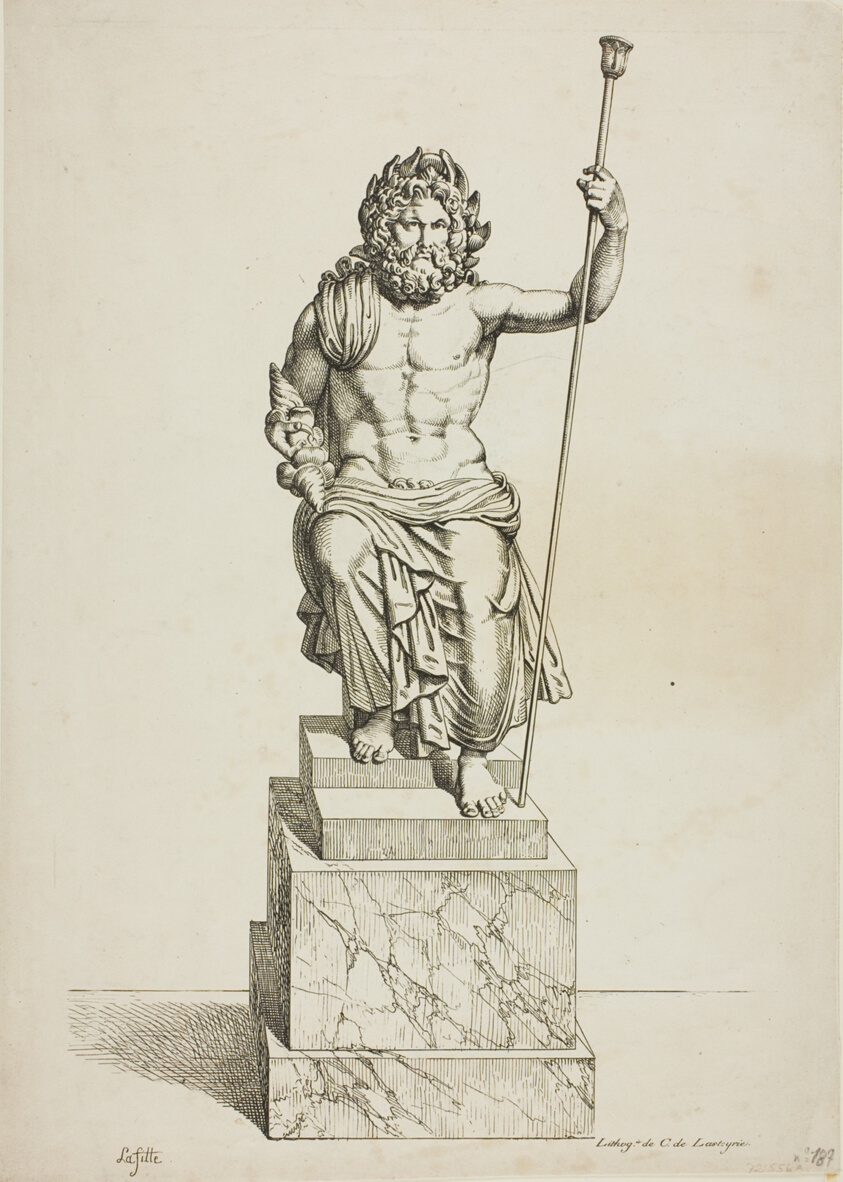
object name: Print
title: Jupiter, drawn from the collection of M. Denon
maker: Louis Lafitte (French, 1770-1828); printed by Comte de Charles Philibert Lasteyrie du Saillant (French, 1759-1849)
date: c. 1820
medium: Lithograph in black on ivory wove paper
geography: France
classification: lithograph; print; prints and drawing